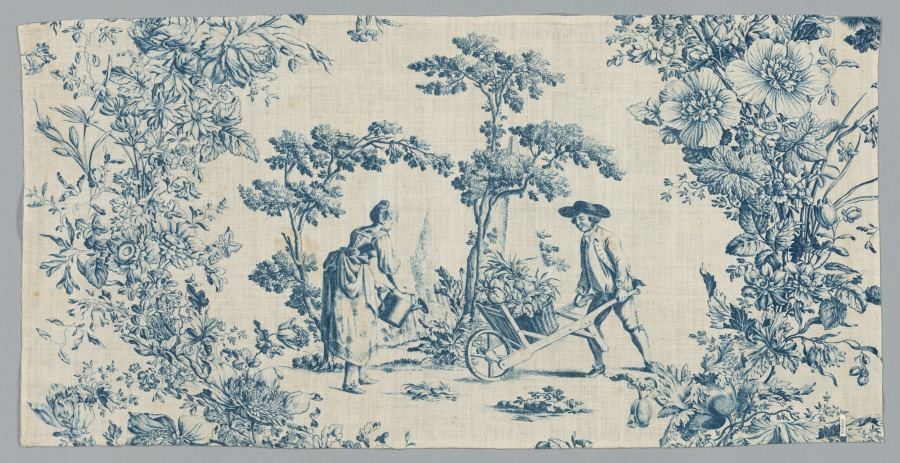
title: Fragment of Printed Cotton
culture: England, late 18th century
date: c. 1785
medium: copperplate printed cotton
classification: Textile